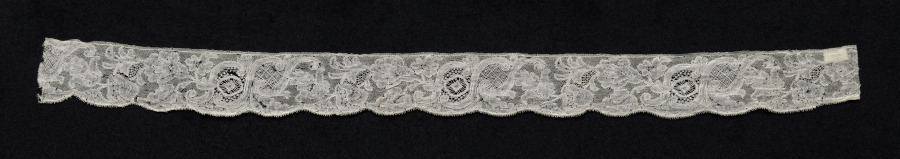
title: Lace Edging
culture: Belgium, Mechelen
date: 1700s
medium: Linen: bobbin lace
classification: Lace